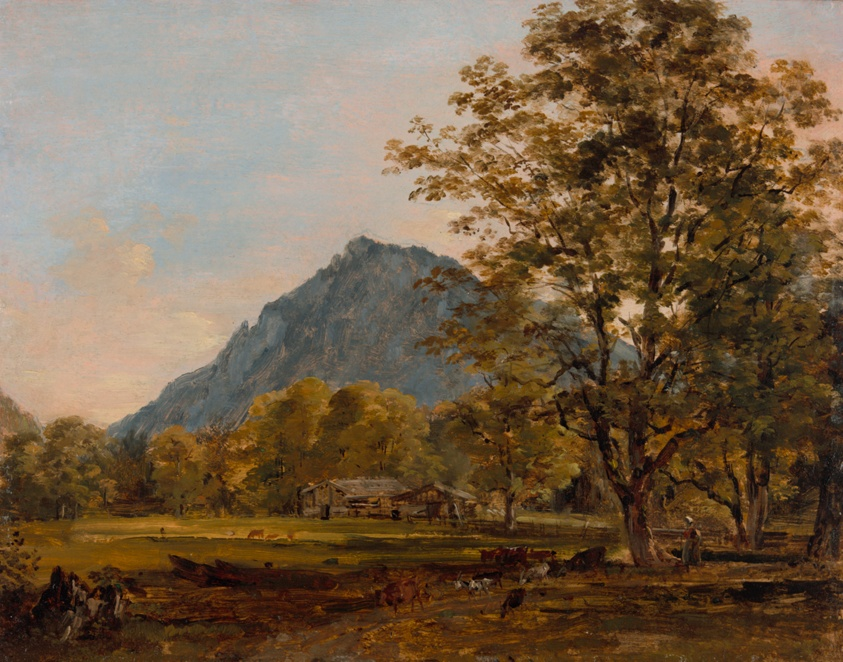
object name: Painting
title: A Farmhouse in the Bavarian Alps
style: nineteenth century, 19th century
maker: Johann Georg von Dillis (German, 1759–1841)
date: c. 1825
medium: Oil on paper, laid onto cardboard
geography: Germany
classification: oil on paper; german; oil paintings (visual works); paint; painting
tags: landscapes, buildings, building, farm, figure, goats, cows, animals, Germany, mountains, mountain, house, farm life, houses, trees